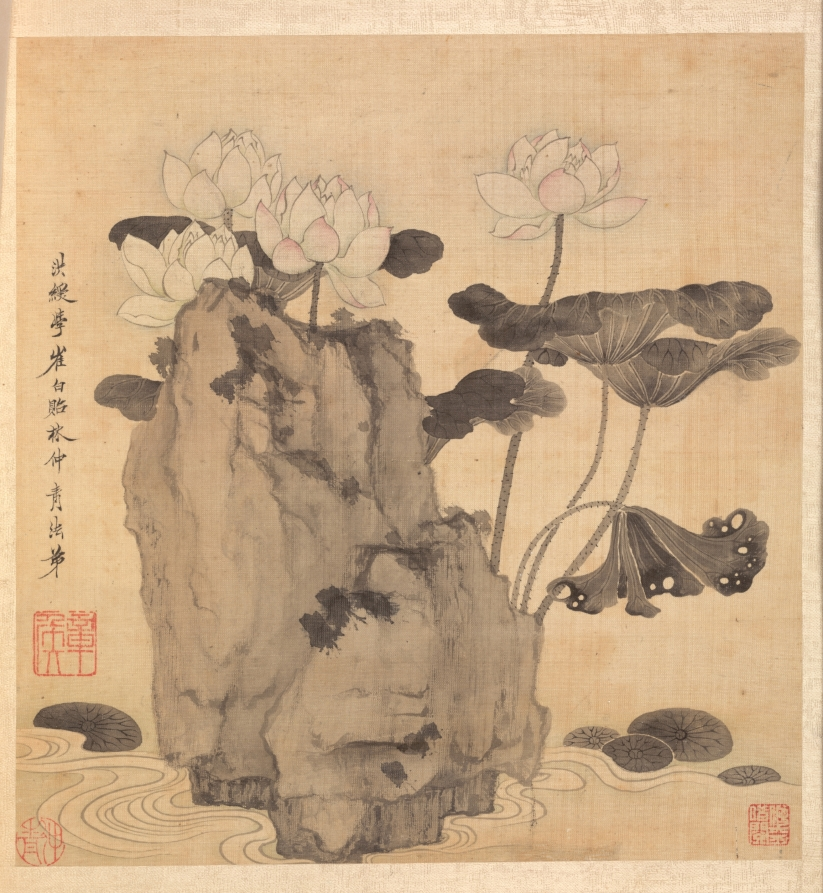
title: Paintings after Ancient Masters: Lotus and Rocks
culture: China, Ming dynasty (1368–1644)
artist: Chen Hongshou (Chinese, 1598/99–1652)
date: 1598–1652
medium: album leaf; ink and color on silk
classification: Painting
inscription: Hongshou painted after the style of Cui Bai [Ts'ui Po] and presented it to the Buddhist disciple Lin Zhongqing. [Seal] Changhou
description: The twenty paintings in this double album by Chen Hongshou include landscapes, figures, and flowers. It also has one leaf featuring a woman, an often-used subject not found in the other albums from the latter part of his career. Chen's late works are wonderful summations of his peculiar and quirky art—archaistic, hyper-refined—but without accompanying shallowness or sentimentality. His figures and landscapes in the late albums are miniaturized, not unlike the small Chinese gardens, or the carefully selected small table rocks or old roots used for contemplation to see the world in miniature. This loss of scale is quite deliberate and reflects the psychological situation of a depressed class like the Ming loyalist officials and scholars, deprived of their integrity and honor, and forced to lead a diminished and restricted existence.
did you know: Chen Hongshou made this double album with twenty paintings for a friend, Lin Zhongqing.